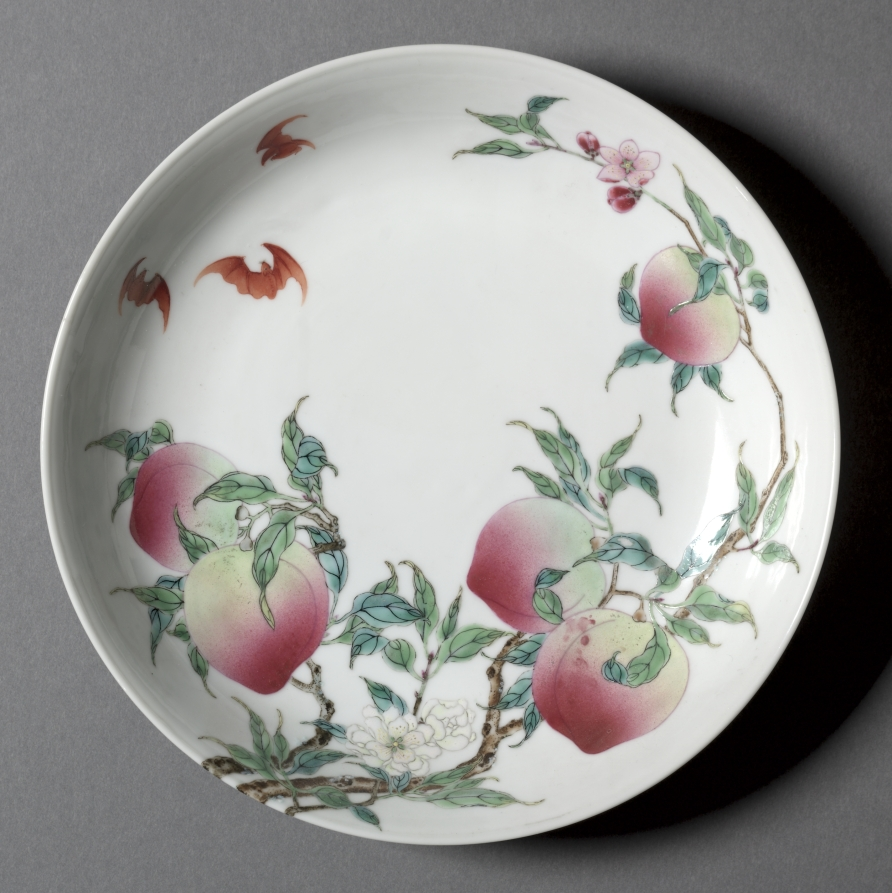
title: Dish with Bats and Peaches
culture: China, Jiangxi province, Jingdezhen kilns, Qing dynasty (1644-1911), Yongzheng mark and reign (1722-35)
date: 1723–35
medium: porcelain with famille rose overglaze enamel decoration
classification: Ceramic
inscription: 大清雍正年制